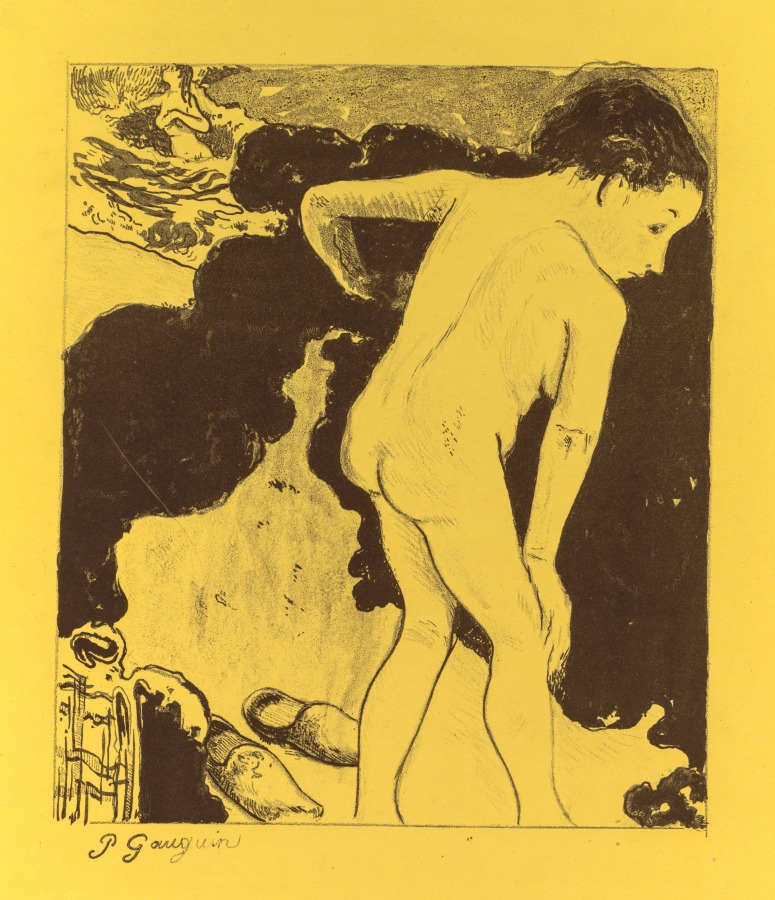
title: Volpini Suite: Breton Bathers (Baigneuses Bretonnes)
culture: France, 19th century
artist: Paul Gauguin (French, 1848–1903)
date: 1889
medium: zincograph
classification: Print